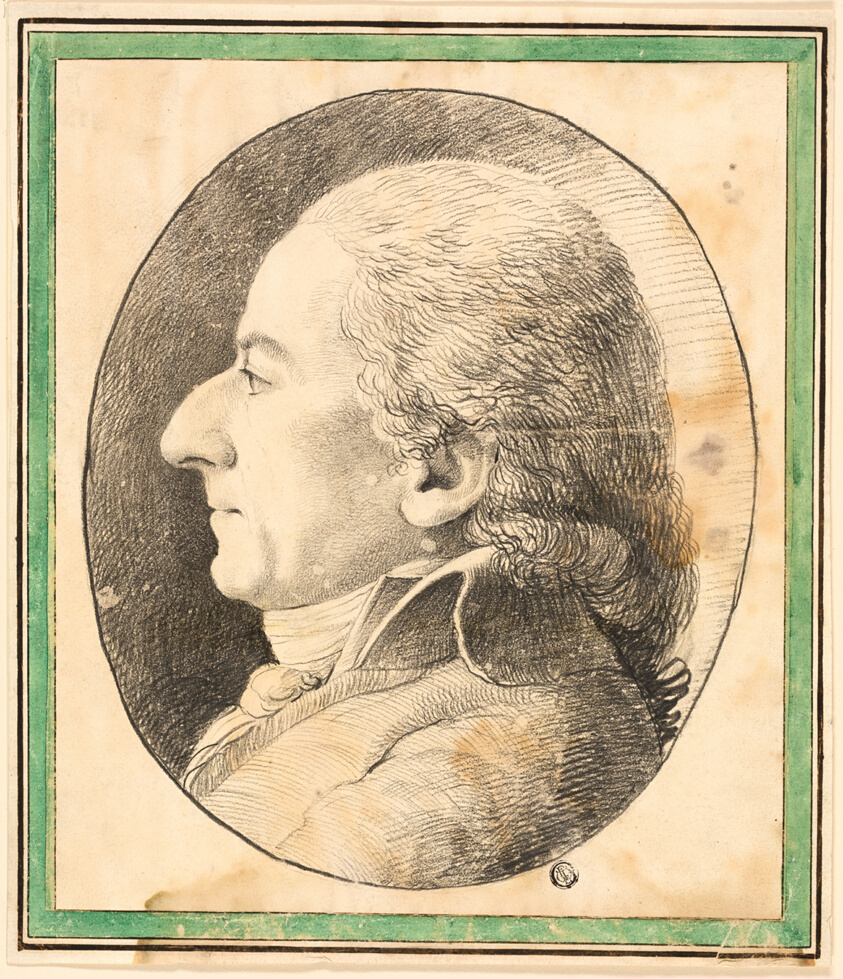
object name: Drawing and Watercolor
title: Profile Bust of a Man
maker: Unknown Artist; Spanish, 18th-19th centuries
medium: Black crayon on ivory wove paper, laid down on ivory laid paper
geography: Spain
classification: drawings (visual works); prints and drawing